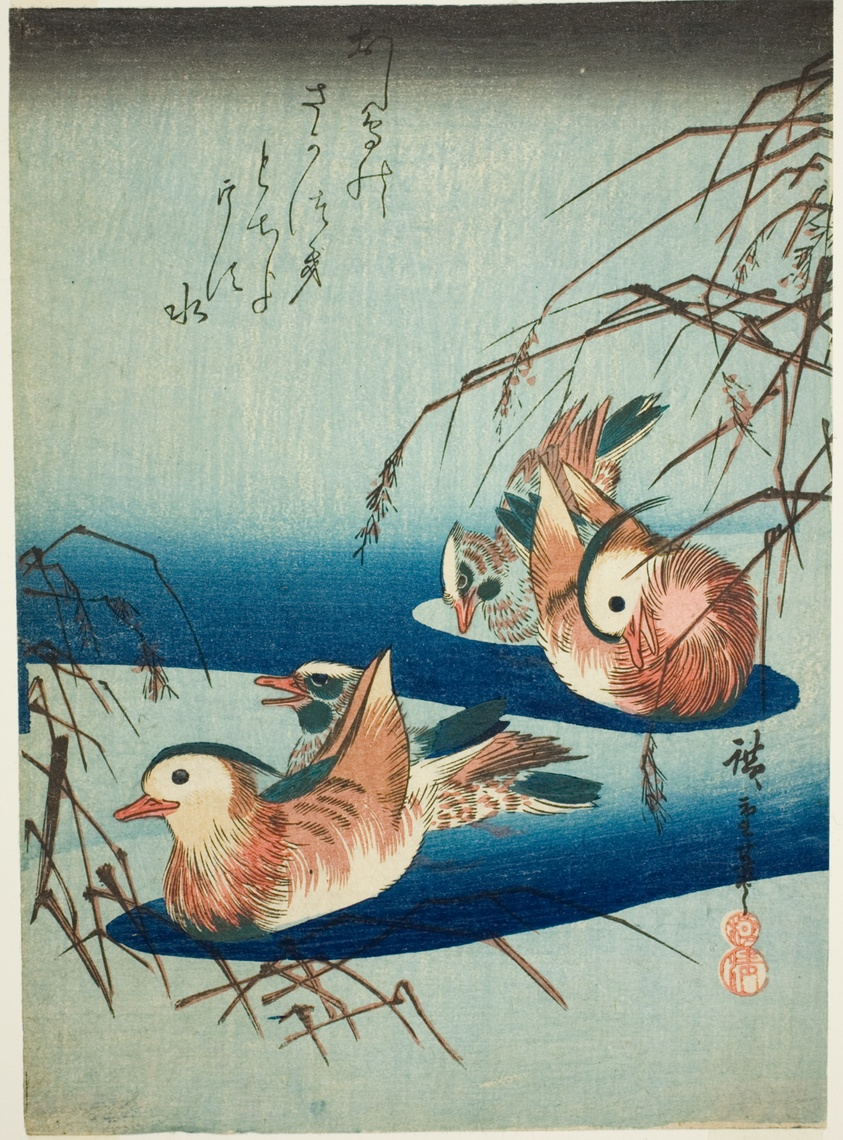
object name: Print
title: Mandarin ducks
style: Japanese (culture or style)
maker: Utagawa Hiroshige 歌川 広重; Japanese, 1797-1858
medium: Color woodblock print; chuban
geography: Japan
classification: print; asian art